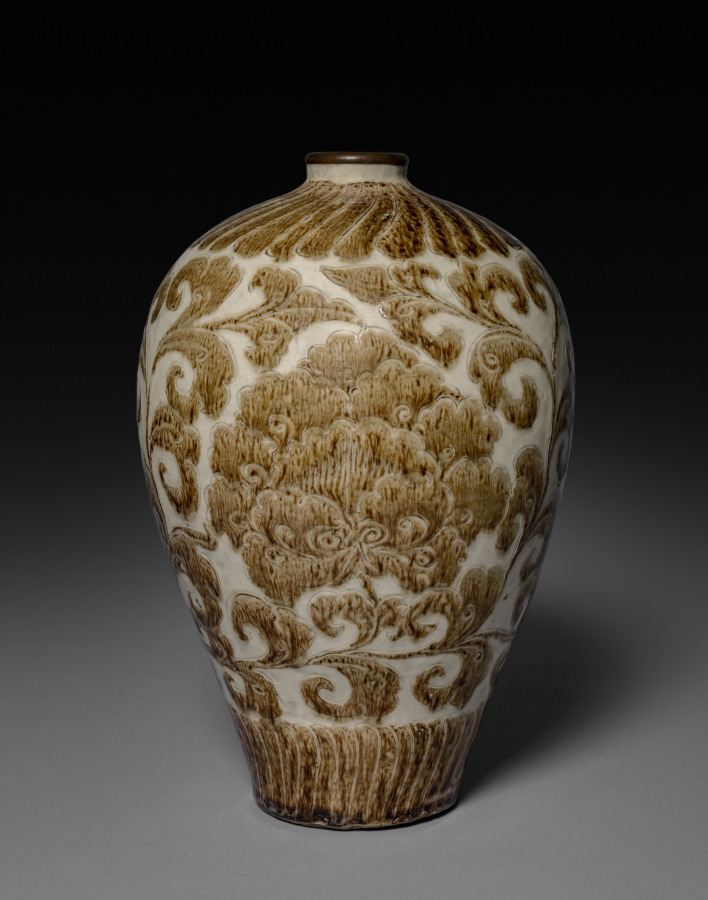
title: Meiping Vase: Cizhou Ware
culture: China, Northern Song dynasty (960-1127)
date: 1100s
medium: Buff stoneware with carved underglaze slip decoration, Cizhou ware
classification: Ceramic